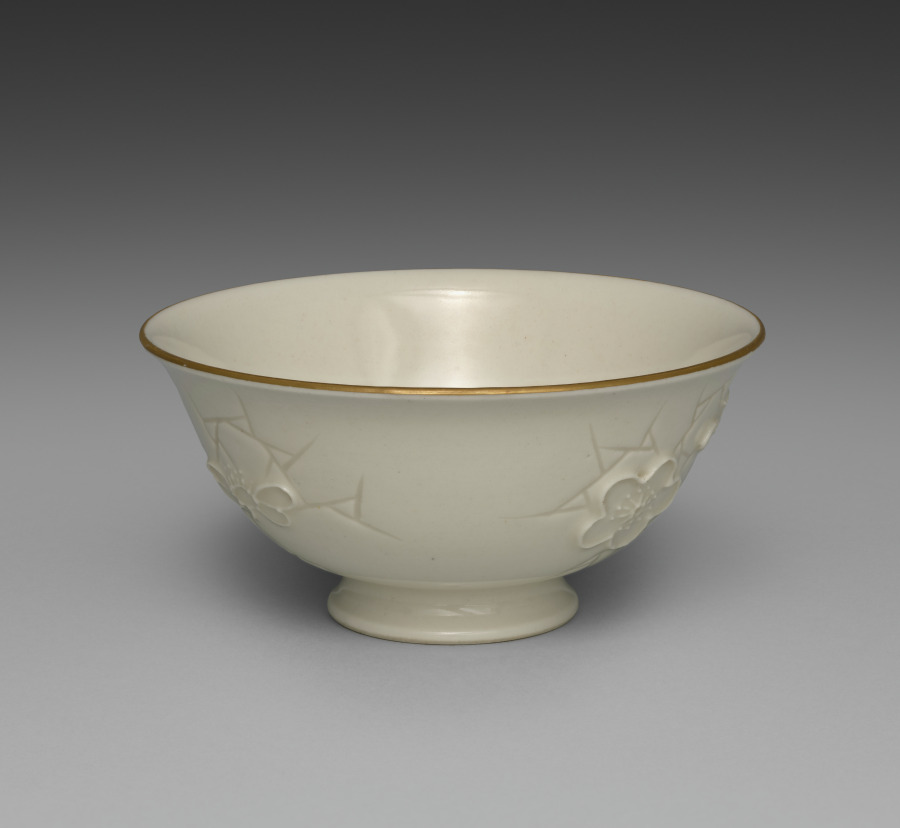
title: Bowl from Dining Set with Plum Blossoms and Cracked-Ice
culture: Japan, Meiji period (1868–1912)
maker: Seifū Yohei II (Japanese, 1844–1878)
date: c. 1875–78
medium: Porcelain with molded designs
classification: Ceramic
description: Each item in this set has a delicate low-relief design of flowering plum branches over scattered, intersecting lines meant to resemble the cracked-ice surface of a frozen body of water and is signed on the base in gold pigment. While Yohei II produced many fine works in underglaze blue, like those produced by Kiyomizu Shichibei, he also made works in quite different styles later in his career, from the early 1870 s. In 1873, he was appointed purveyor to the Industrial Center of Kyoto Prefecture, a designation associated with Kyoto’s efforts to reach an international market through the port of Kobe; and from 1875 until his death, he was involved in national-level projects to present Japanese ceramics across the world. It was during this period that Yohei III was apprenticed to Yohei II, and it has been suggested that this set may in fact be an early example of Yohei III’s work, which he signed with his teacher’s name. Decorated with flowers resembling Japanese textile motifs, the set calls to mind the design of Yohei II’s pair of vases with plum blossoms in the Victoria and Albert Museum. Here, the elaborate trees created for a formal public exhibition setting have been translated into the approachable blossoms of the genteel domestic environment. While the designs are consistent across the pieces, each raised flower petal and pistil and each incised line in the ice was done by hand, so the cups, bowls, and dishes are similar yet unique. The bottoms of two boxes once identified the set’s owner, but the information has been deliberately obscured with black ink. However, inscriptions still visible appear to indicate two occasions, once at the end of July 1886 , and once again in June 1916 , when parts of the set were requested from Hokura in Niigata Prefecture. The location corresponds to a neighborhood in the present-day city of Jōetsu. The surname Tsuji 辻 also appears on a paper tag affixed to one of the box cloths. Future research may possibly reveal more about their provenance. A vase by Yohei III in a private collection combines the formal grandeur of the Yohei II vases in the Victoria and Albert Museum with the gentler design of this dining set, placing flowering plum trees against soft, scalloped-edge clouds resembling those in golden screens.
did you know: The dining wares have a creamy white coloration that the four boxes containing them identify as Korean in style.